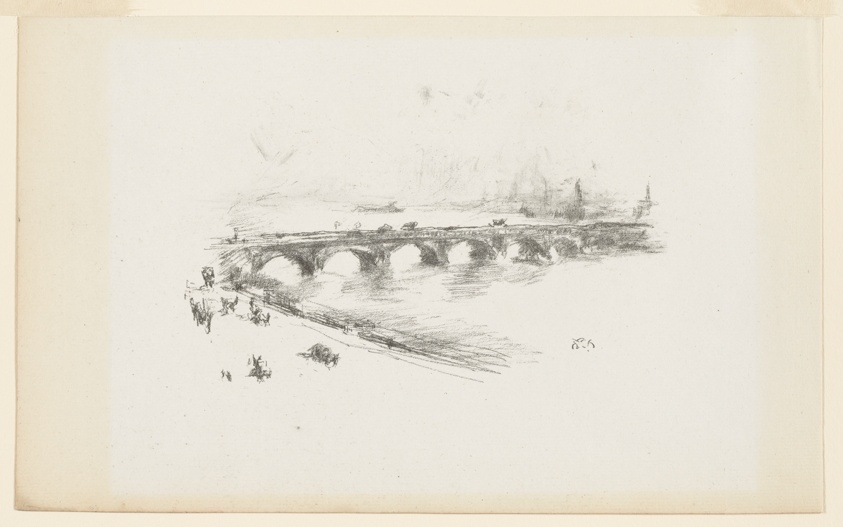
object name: Print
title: Evening, Little Waterloo Bridge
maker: Whistler, James McNeill; American, 1834-1903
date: 1896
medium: Transfer lithograph in black ink on ivory laid paper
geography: United States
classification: transfer lithograph; lithograph; print; prints and drawing; paper